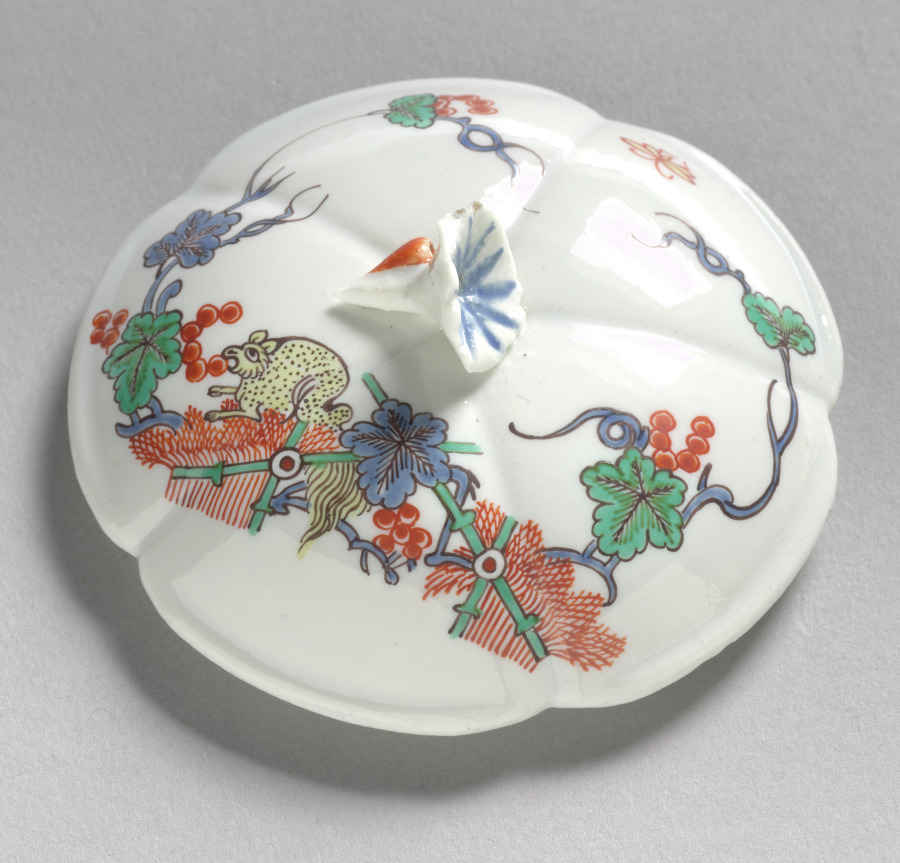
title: Sugar Bowl (cover)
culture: France, Chantilly, 18th century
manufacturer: Chantilly Porcelain Factory (French)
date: c. 1730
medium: soft-paste porcelain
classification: Ceramic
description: The pieces composing this individual tea set are entirely typical of Chantilly soft-paste porcelain in the Kakiemon style. Both the form and decoration of these pieces were inspired by Japanese prototypes. The use of knobs in the form of trumpet-shaped blossoms is characteristic of Chantilly wares.